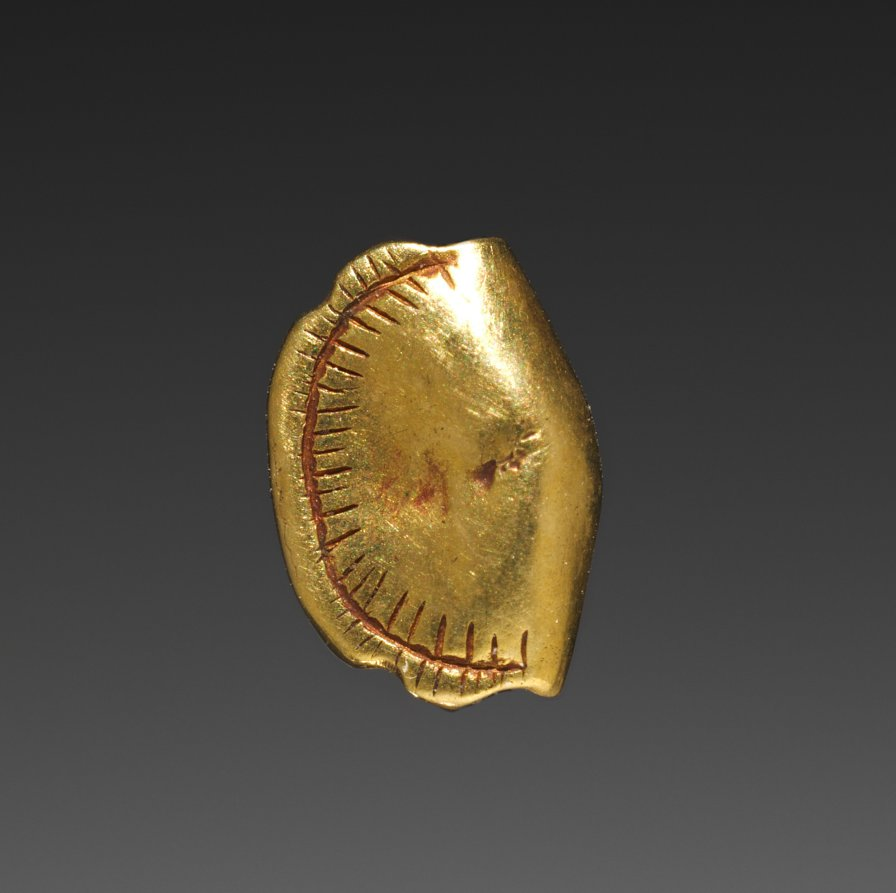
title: Wallet Bead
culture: Egypt, New Kingdom (1540–1069 BCE), Dynasty 18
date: 1540–1296 BCE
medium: gold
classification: Jewelry